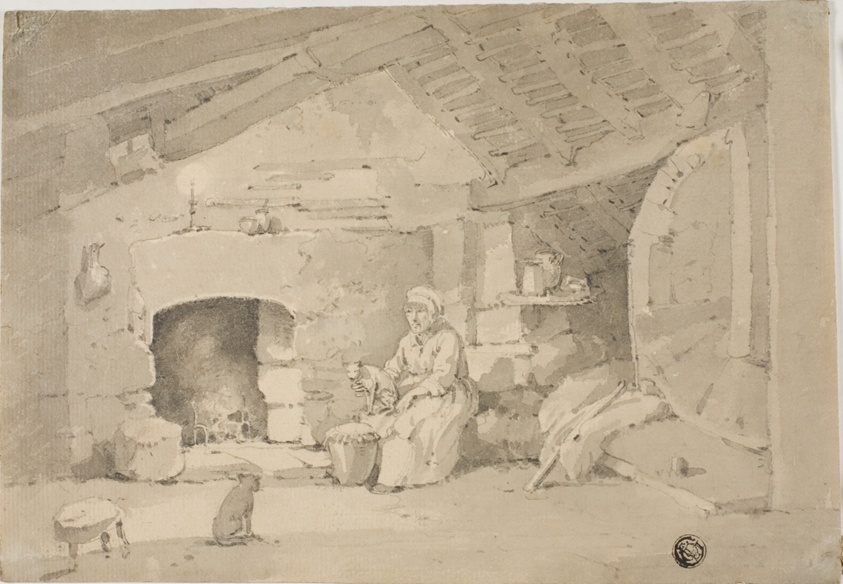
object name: Drawing and Watercolor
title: Woman in a Rustic Interior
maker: Style of William Alexander (English, 1767-1816)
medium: Brush and gray wash, with graphite, on cream laid paper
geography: England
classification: ink or chalk wash; drawings (visual works); prints and drawing